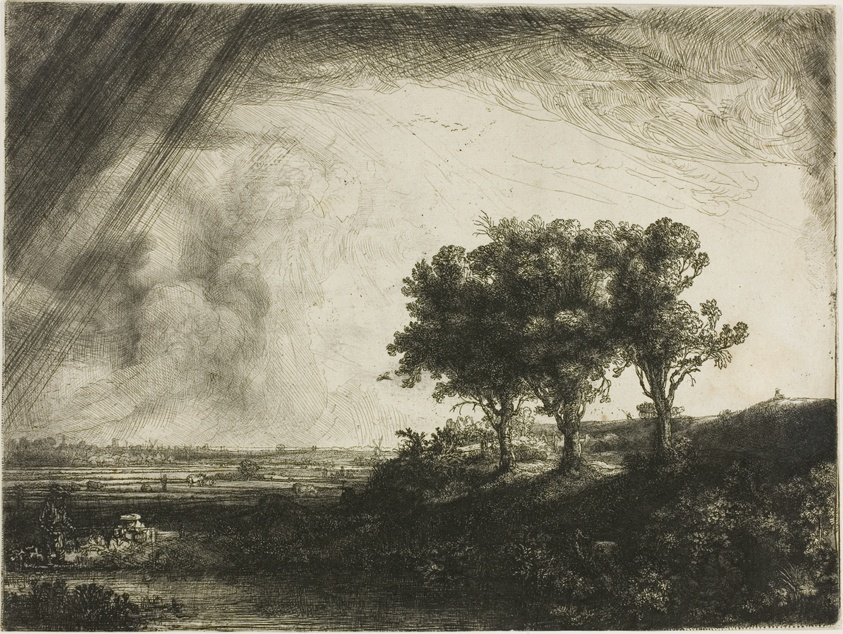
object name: Print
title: The Three Trees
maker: Rembrandt van Rijn (Dutch, 1606-1669)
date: 1643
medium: Etching and drypoint on ivory laid paper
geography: Holland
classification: etching; print; prints and drawing; paper; drypoint